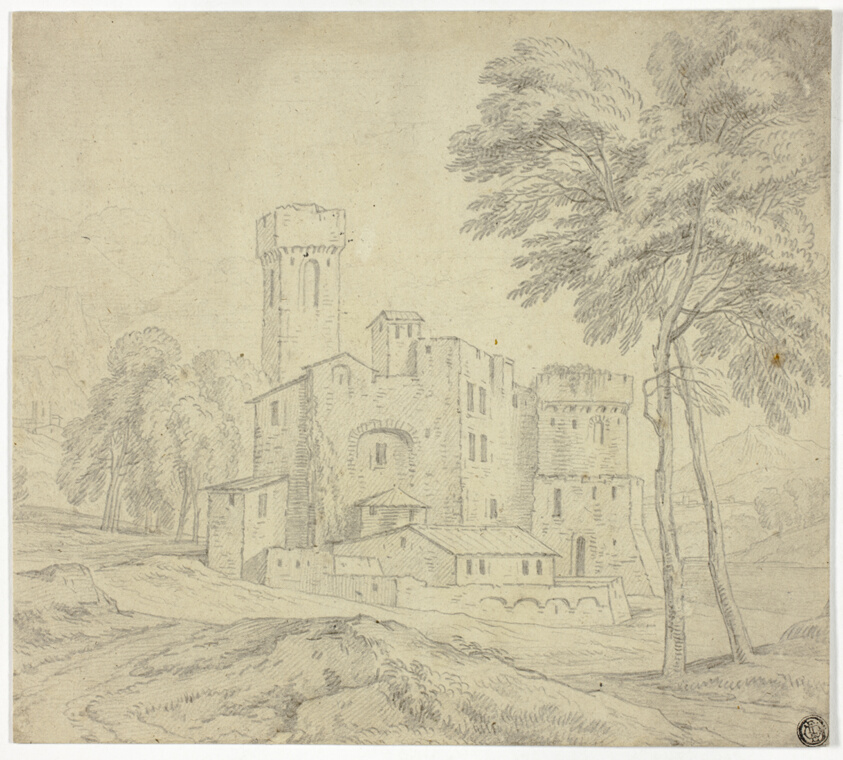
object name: Drawing and Watercolor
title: Italianate Landscape with Castle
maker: Circle of Adriaen Frans Boudewyns (Flemish, 1644-1711); or Nicolas Poussin (French, 1594-1665); or Adriaen Frans Boudewyns (Flemish, 1644-1711); or circle of Gaspard Dughet Gaspard (French, 1615-1675)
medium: Black chalk on buff laid paper, laid down on buff laid paper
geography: France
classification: chalk; paper; drawings (visual works); prints and drawing